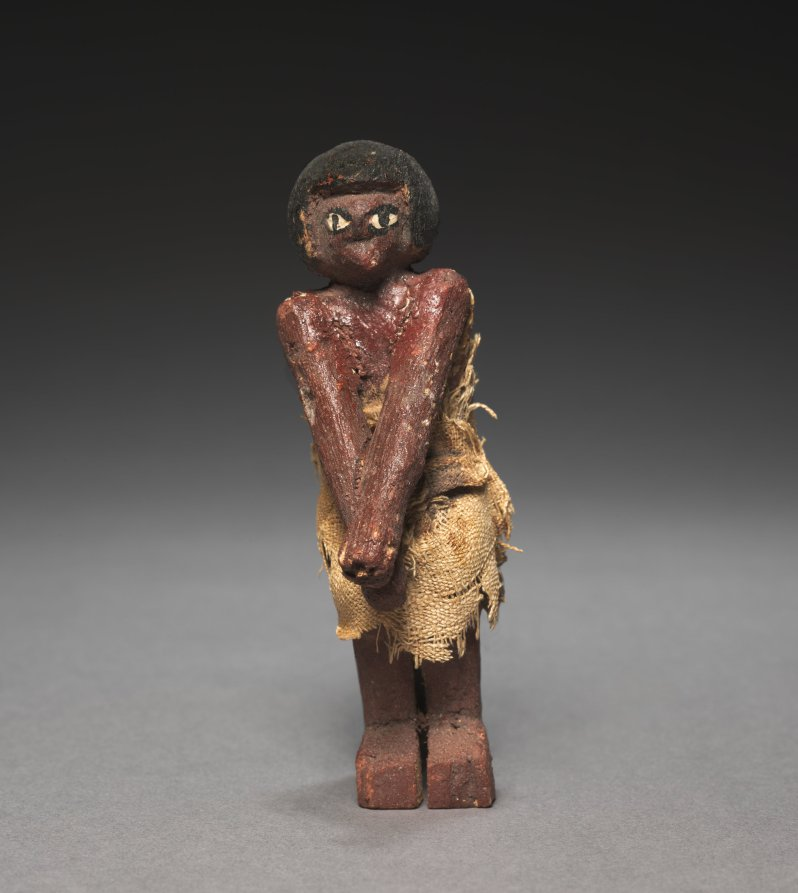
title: Seated Model Sailor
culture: Egypt, Middle Kingdom (2040–1648 BCE), Dynasties 11–12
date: 2000–1000 BCE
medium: painted sycamore fig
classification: Funerary Equipment